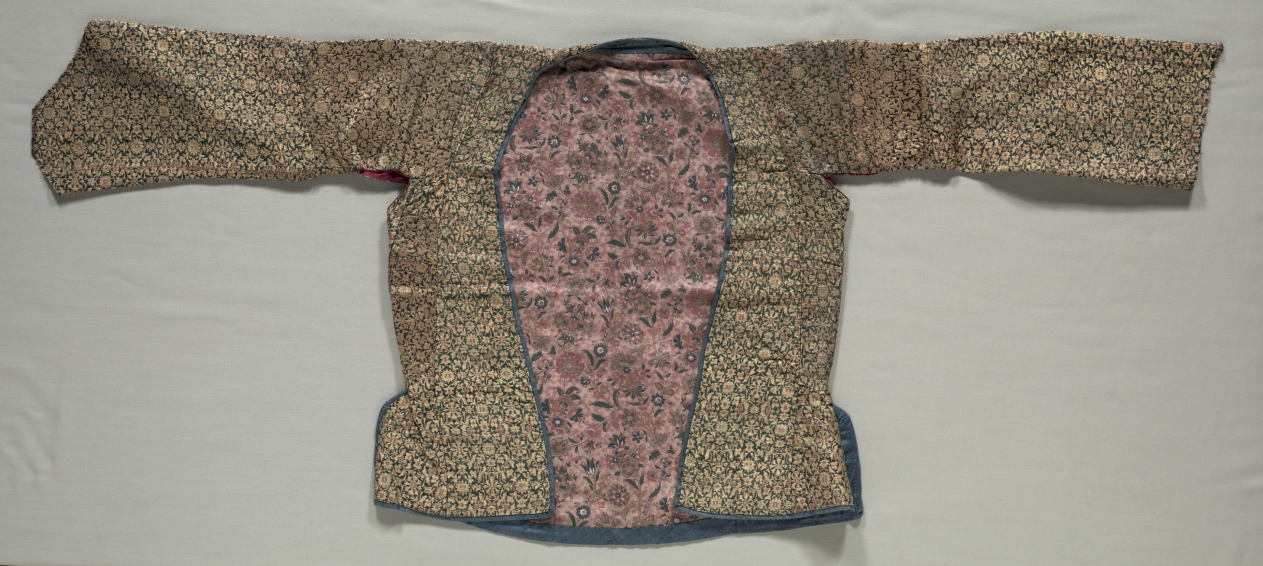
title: Jacket for a Child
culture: Iran, 18th century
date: 1700s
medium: Silk taquete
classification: Garment